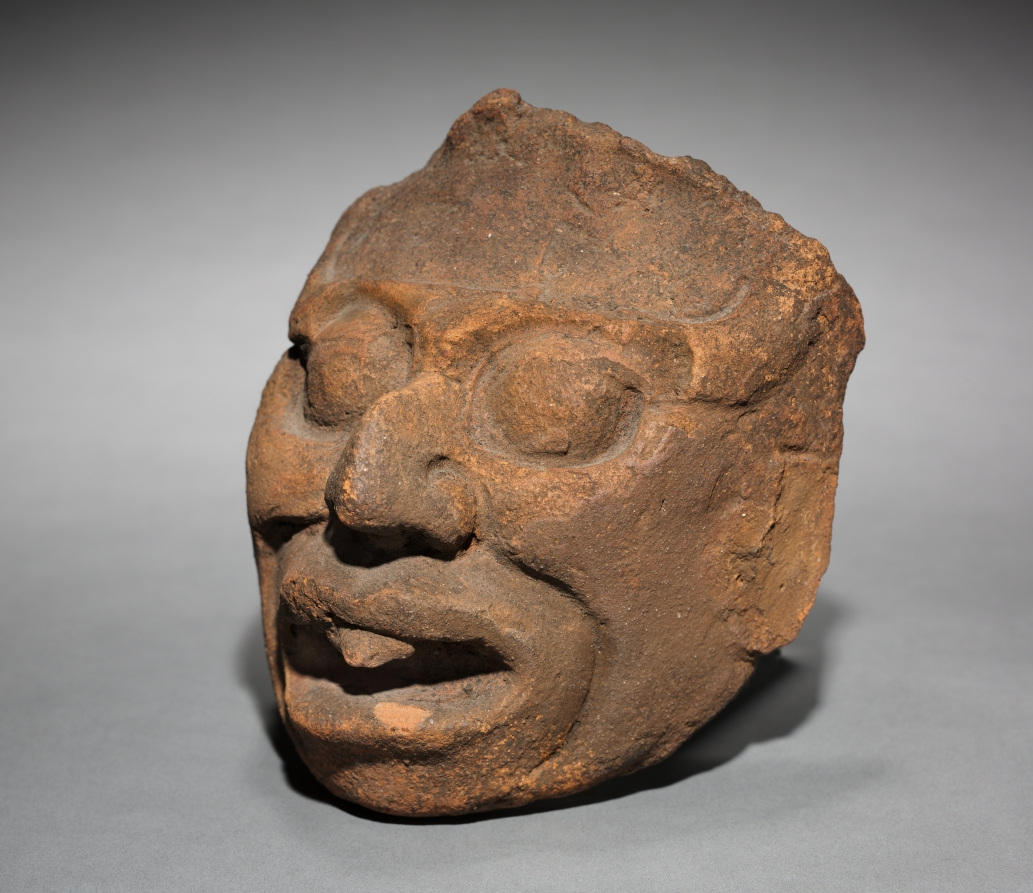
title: Face Fragment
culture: Mexico, Palenque region(?), Maya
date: 600–1000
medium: molded pottery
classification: Sculpture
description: This thick, heavy ceramic face fragment may come from an incensario (incense burner). Several features, including the tau- or T-shaped front teeth, suggest it represents a deity known today only as G1 due to difficulties in translating its Maya name, which is recorded in hieroglyphs. The deity’s meanings are equally elusive, though it seems to be associated with both the sun and water.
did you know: G1’s distinctive tooth was perhaps inspired by a 63 million-year-old fossilized shark tooth.